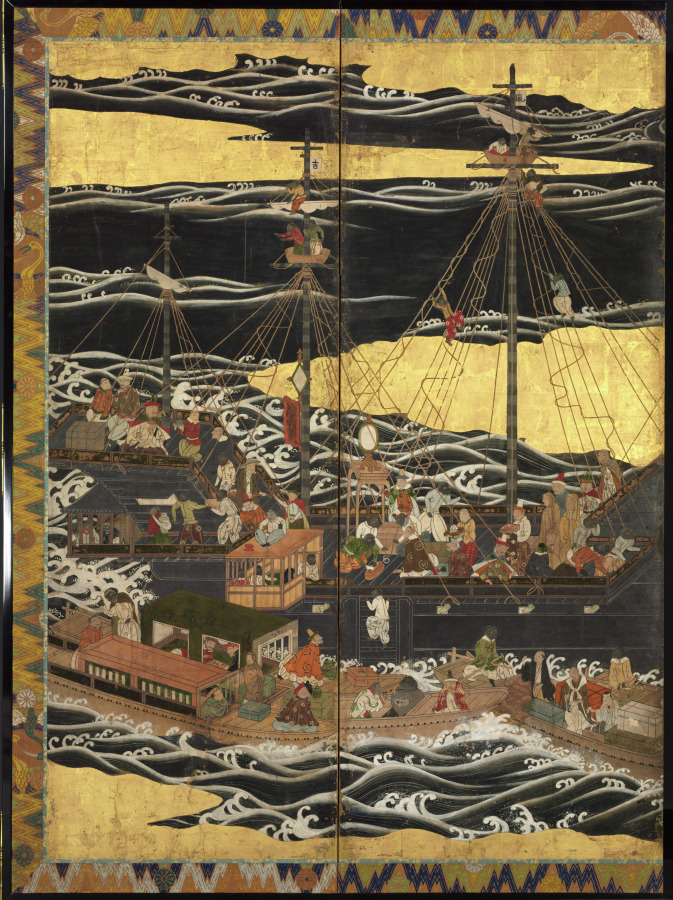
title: Arrival of the "Southern Barbarians"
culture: Japan, Momoyama period (1573–1615)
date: c. 1600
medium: One of a pair of six-panel folding screens; ink, color, and gold on paper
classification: Painting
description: This screen and its corresponding screen show Portuguese merchants arriving in Japan, having crossed the oceans in their large ship with a multinational crew. The Portuguese were known in Japan as the “Southern Barbarians” because they arrived from the south and their customs and manners were unfamiliar to the Japanese, who had not encountered anyone from Europe until their first appearance in 1543. In 1639, the Portuguese were forced out of Japan, mainly owing to internal difficulties caused by their Catholic missionaries, but they were a major conduit for both objects and ideas from Europe for nearly 100 years.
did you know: Europeans were called "Southern Barbarians" because their ships arrived in Japan from the south.